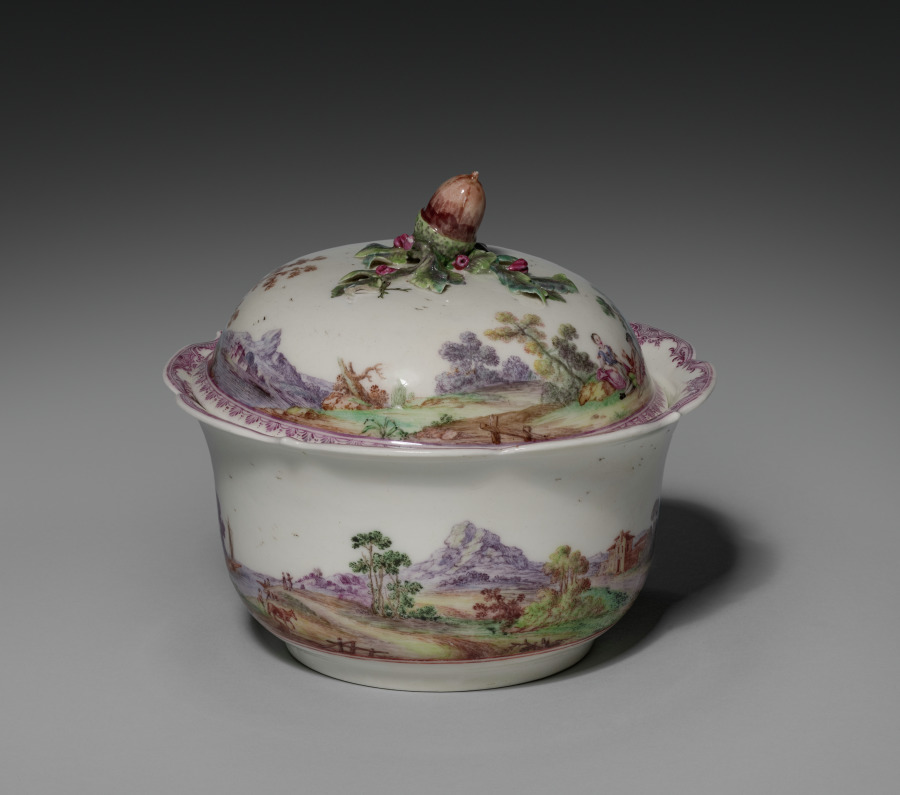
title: Covered Sugar Bowl (Pot à sucre)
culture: France, Vincennes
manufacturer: Vincennes Porcelain Manufactory (French, 1740–1756)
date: 1745–48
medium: soft-paste porcelain with enamel decoration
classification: Ceramic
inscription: In red on bottom of bowl: P.M. In red on interior of lid: P.M. 16 4.8B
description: This covered bowl, likely intended for sugar, is one of the earliest surviving examples of Vincennes porcelain, a reputed French factory moved to Sèvres in 1756. The continuous landscape is painted on this object en pointillé, a method by which a painter forms images with tiny dots. This style may have been influenced by their German competitors at the Meissen Porcelain Factory.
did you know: Three separate shades of purple, one of the most expensive colors to produce on porcelain during this time, are used extensively in this object’s paintings.